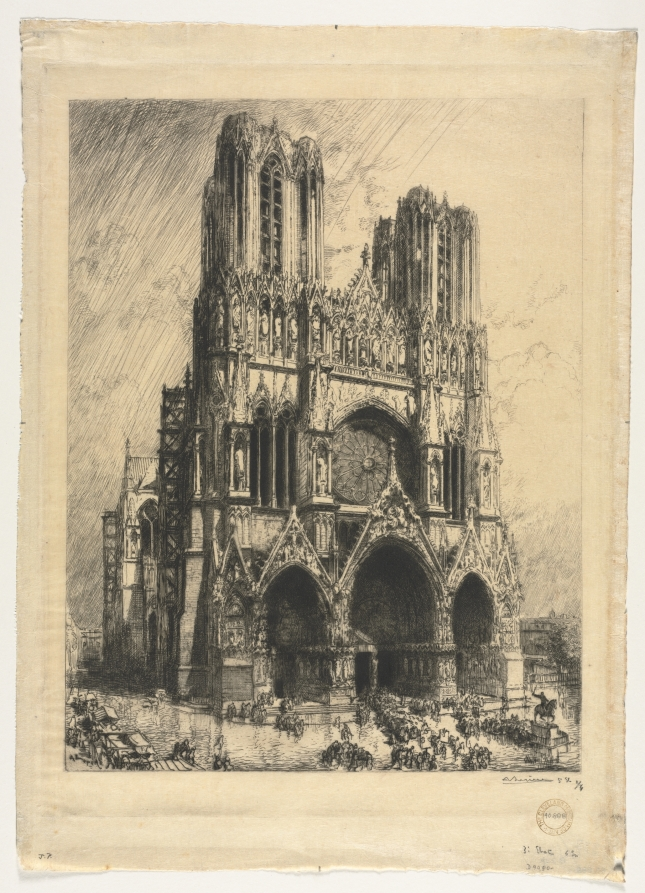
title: Reims Cathedral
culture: France, 19th-20th century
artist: Auguste Louis Lepère (French, 1849–1918)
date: 1911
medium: etching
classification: Print